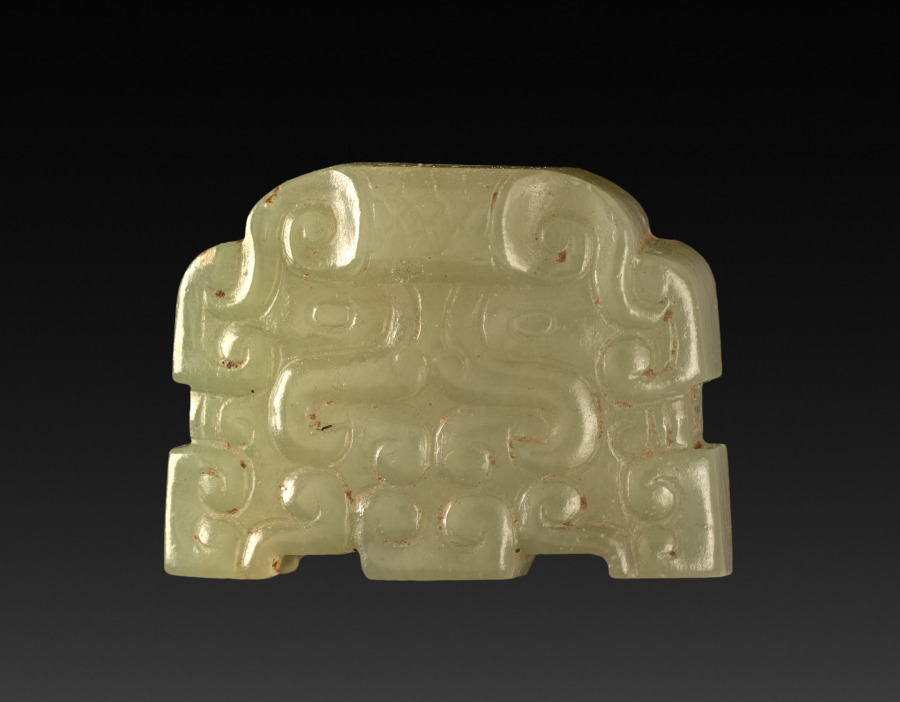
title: Ogre Mask (Taotie)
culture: China, Eastern Zhou dynasty (770–256 BCE), Warring States period (475–221 BCE)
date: 475–221 BCE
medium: nephrite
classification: Jade